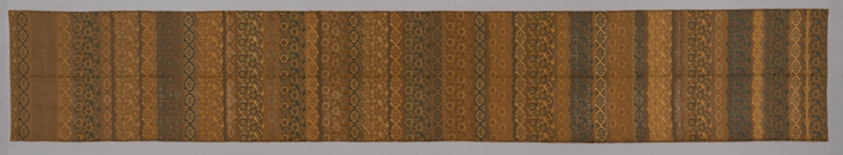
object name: Costume and Accessories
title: Obi (Belt)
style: late edo, Japanism, meiji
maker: Japan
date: late Edo period (1789–1868)/ Meiji period (1868–1912), 19th century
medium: All-over pattern of geometric and floral designs; in shades of green, brown, gold and silver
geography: Japan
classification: textile; weaving; costume; obi (sash)